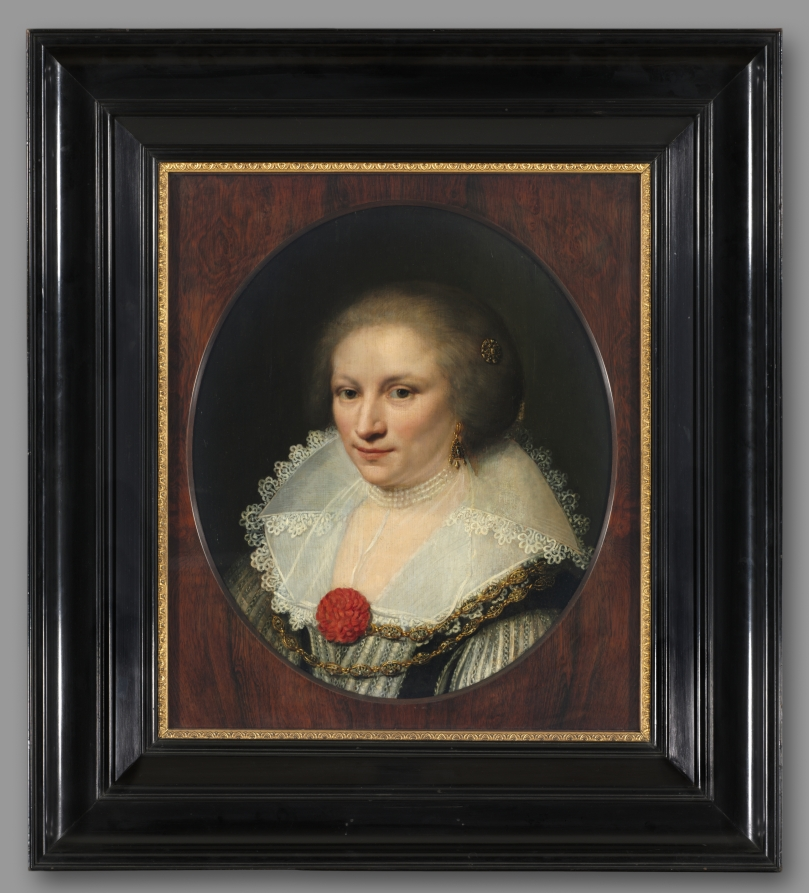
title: Portrait of a Woman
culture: Netherlands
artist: Jan Anthonisz. van Ravesteyn (Dutch, c. 1570–1657)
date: 1620s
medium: oil on wood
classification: Painting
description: How do you conserve a painting when portions are missing? The mid-treatment image (below) shows the painting after cleaning, when earlier restorations had been removed. In the painting on view, notice how the conservator reconstructed portions of the sitter’s lace collar and elaborate necklace. She re-created missing passages after studying the artist’s technique in other works and carefully emulating his treatment of the remaining lace and elements of the twisting, three-dimensional necklace. Conversely, there was not enough information to reconstruct what was probably another ornament at the back of the sitter’s head, so the decision was made not to speculate and invent something in that space.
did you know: The sitter wears several transparent and translucent white collars that become opaque when layered.